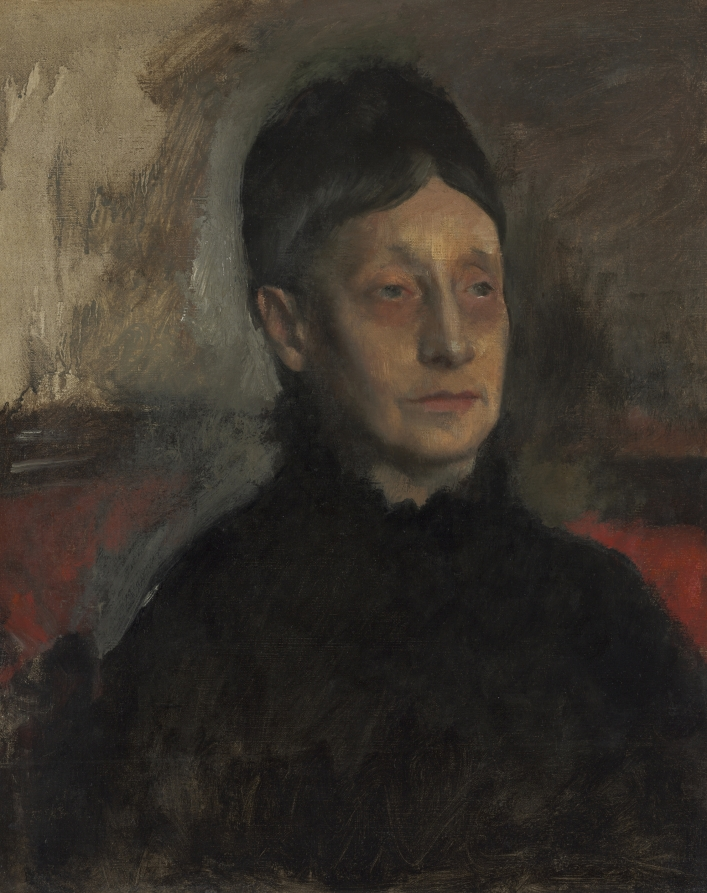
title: Stefanina Primicile Carafa, Marchioness of Cicerale and Duchess of Montejasi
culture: France, 19th century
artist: Edgar Degas (French, 1834–1917)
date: c. 1875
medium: oil on fabric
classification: Painting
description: Although best remembered for his depictions of ballet dancers and race horses, Degas painted many likenesses of his family members. He probably painted this portrait of his aunt, Stefania Carafa (1819–1901), during an extended visit to Naples, where many of his relatives lived. Described in family papers as a highly indulged, fun-loving child, the duchess grew into the stoic, world-weary woman depicted here. No expensive finery reveals her high social rank; indeed she wears a mourning dress, possibly to observe the recent death of her brother Achille.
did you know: Degas was a Parisian by birth, but had family connections around the world, including New Orleans and Italy. In this portrait Degas's aunt, who was a titled member of the aristocracy in southwestern Italy, is captured in loose, flowing strokes with her mourning dress and watery-eyed gaze.